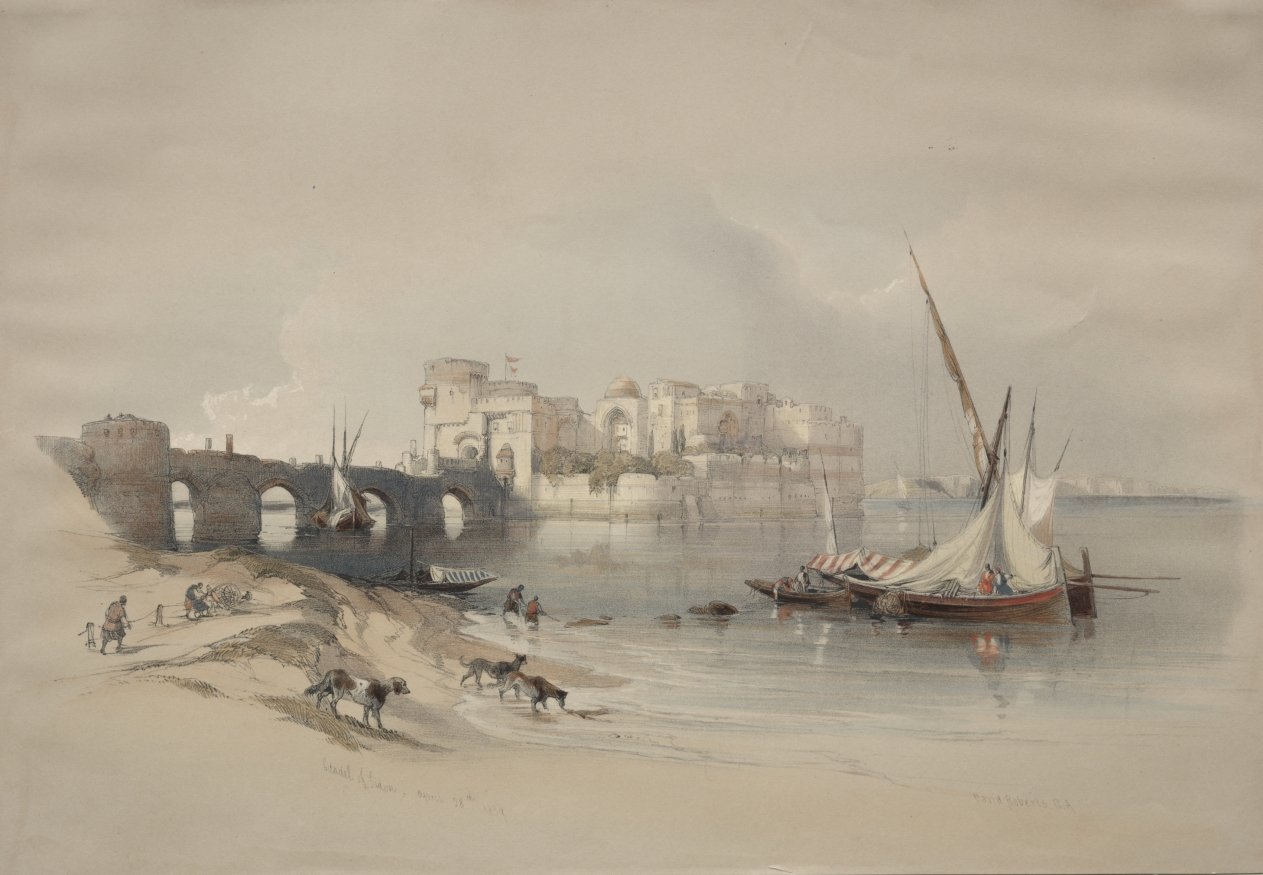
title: Citadel of Sidon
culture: England, 19th century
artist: David Roberts (Scottish, 1796–1864)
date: 1839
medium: color lithograph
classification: Print